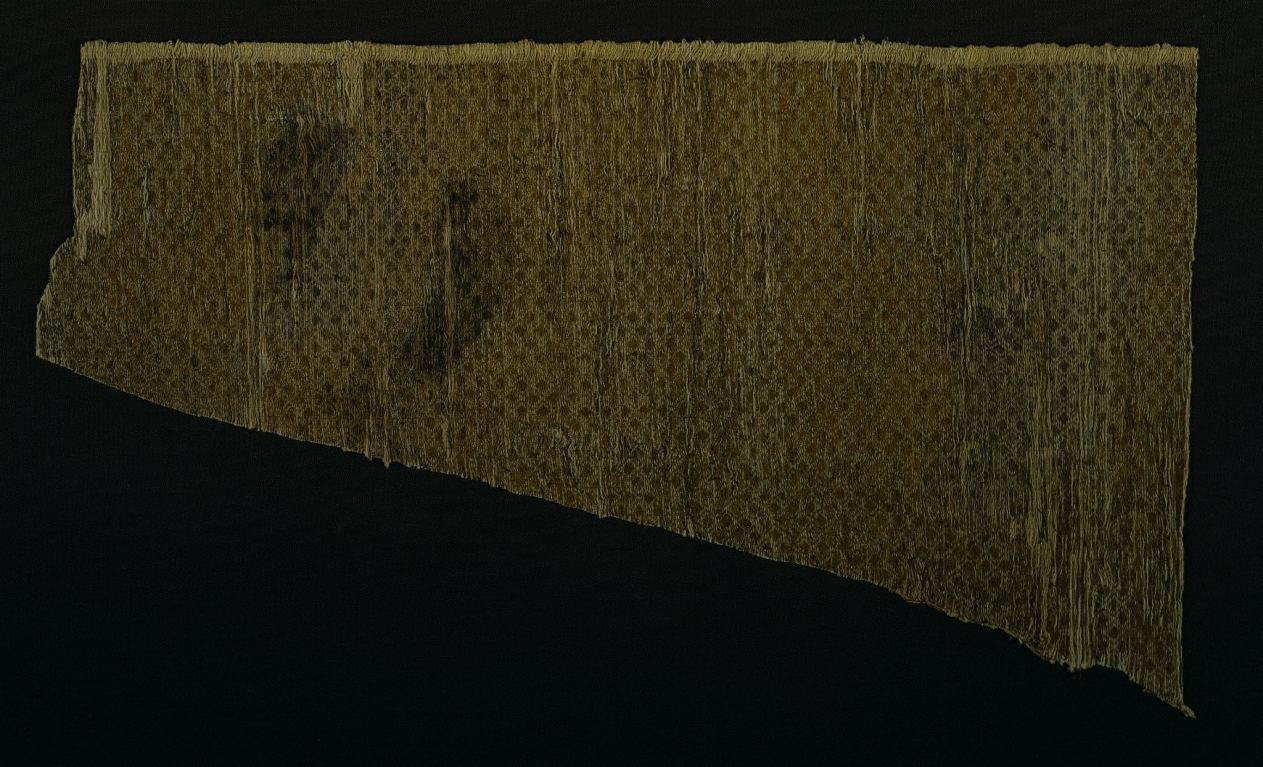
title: Textile with Diamonds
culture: Central Asia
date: 1000s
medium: silk, cotton, and silver thread: tabby with supplementary weft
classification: Textile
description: Few Central Asian luxury silks dating from the 900s–1000s have survived. Here the cotton wefts, together with thin, widely spaced silk warps, identify this example as Central Asian. Its date has been determined by comparing it with two related textiles that are securely dated. At this time Chinese silks with small-scale diamond patterns were usually reserved for undergarments or linings. The use of silver thread for the tiny diamonds in this example, however, may indicate that in Central Asia the design had greater importance. Over time, this textile made its way to Europe, where it was preserved in a church treasury. Because such textiles were expensive, rare, and sometimes associated with saints, they were highly valued regardless of their condition.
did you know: A complete selvage is preserved along one side of the fragment.